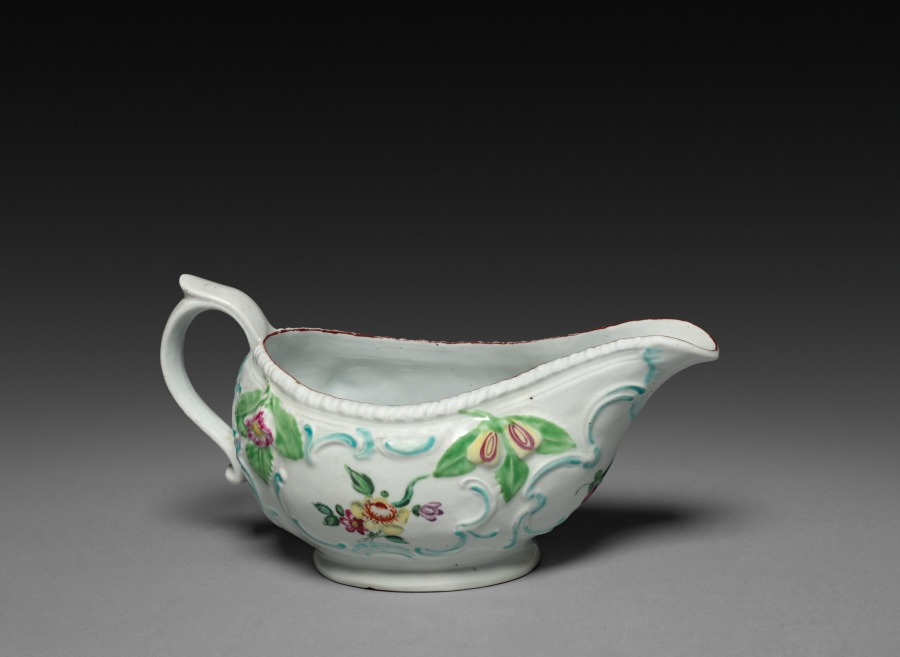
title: Sauce Boat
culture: England, Derby, 18th century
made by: Derby Porcelain Factory (British)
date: c. 1760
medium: soft-paste porcelain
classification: Ceramic